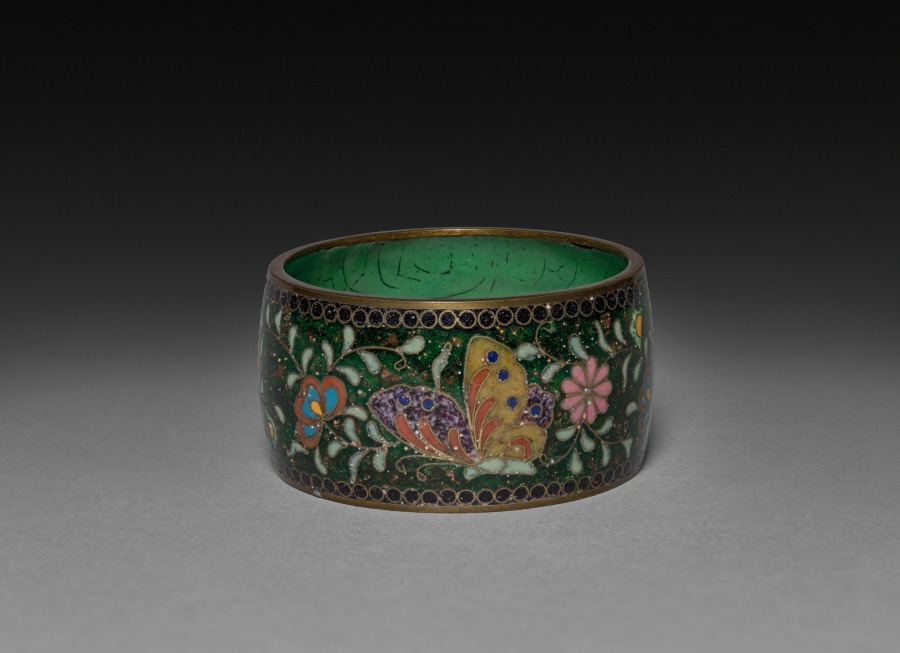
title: Napkin Ring with Butterflies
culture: Japan, Meiji period (1868–1912) or Taishō period (1912–26)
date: early 1900s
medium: cloisonne enamel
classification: Enamel